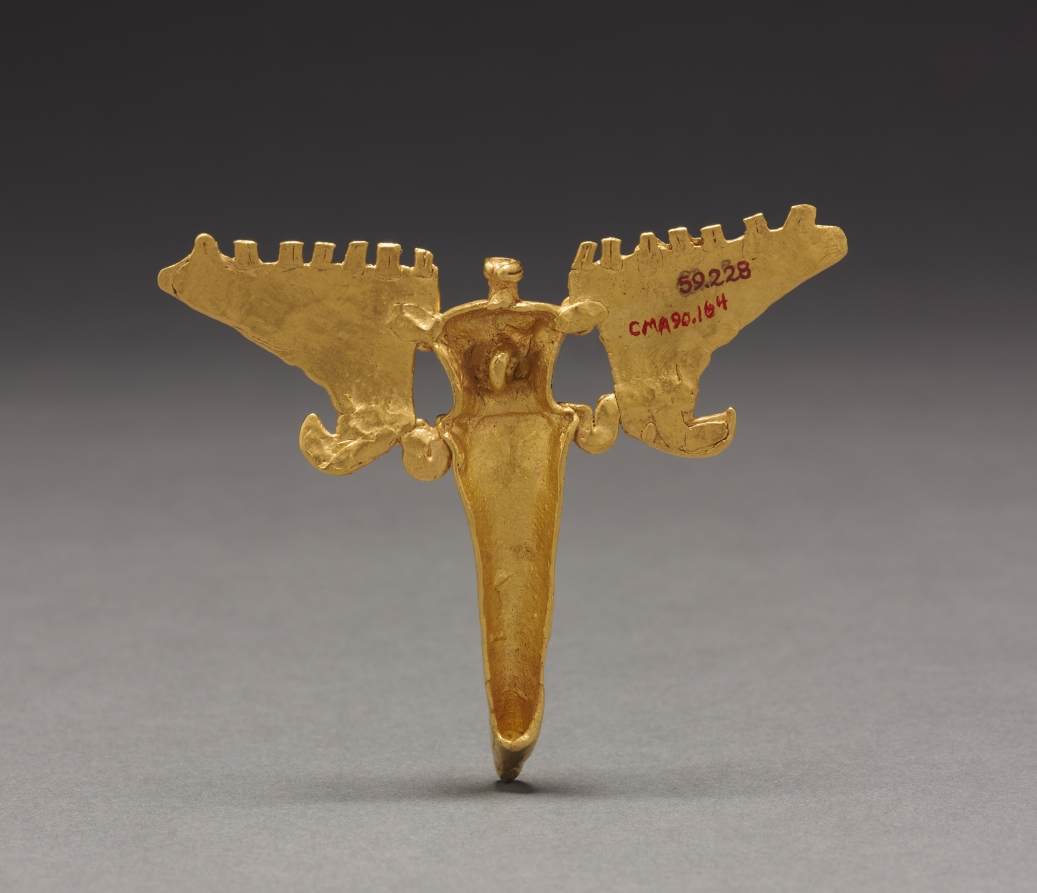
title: Tusk Figural Pendant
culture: Western Panama, Veraguas-Gran Chiriquí Style, c. 1000-1550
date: c. 1000–1550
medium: cast and hammered gold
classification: Metalwork